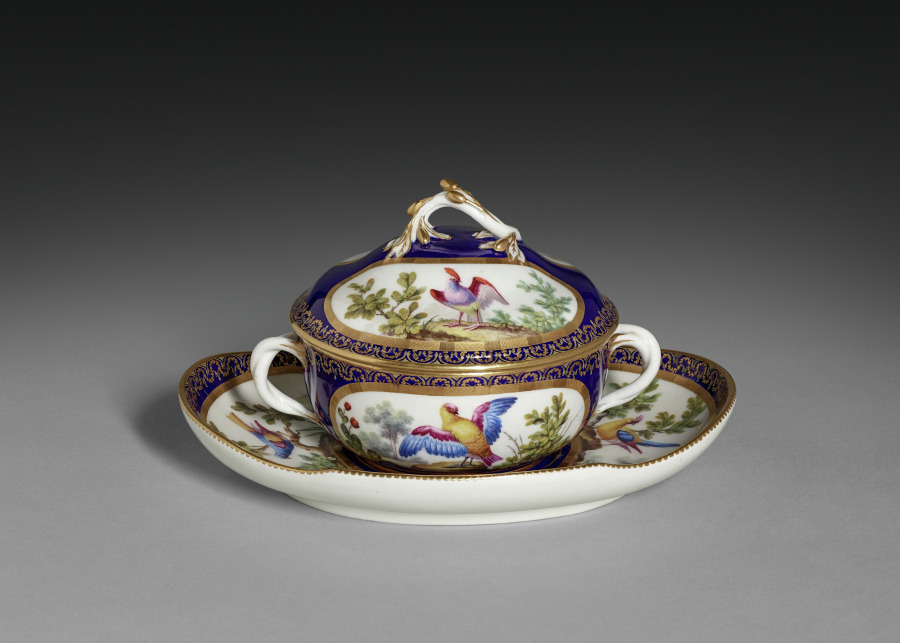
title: Covered Broth Bowl and Stand (Écuelle ronde et plateau ovale)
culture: France, Sèvres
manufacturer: Sèvres Porcelain Factory (French, est. 1756)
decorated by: François-Joseph Aloncle (French)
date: 1772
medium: soft-paste porcelain with enamel and gilt decoration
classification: Ceramic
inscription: Interlaced Ls with date letter 'T'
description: Birds were collected in all forms during the 18th century following an increased European interest in natural history. The birds on this bowl and stand were painted by François-Joseph Aloncle, one of the Sèvres porcelain factory’s principal bird painters. Small, two handled bowls like this one would hold broths or soups consumed by an individual during the toilette, a ritual of washing and dressing practiced by the 18th-century French elite.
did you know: Two different colors of gold decorate these objects’ borders, exemplifying more complex forms of gilding introduced in the 1770s.